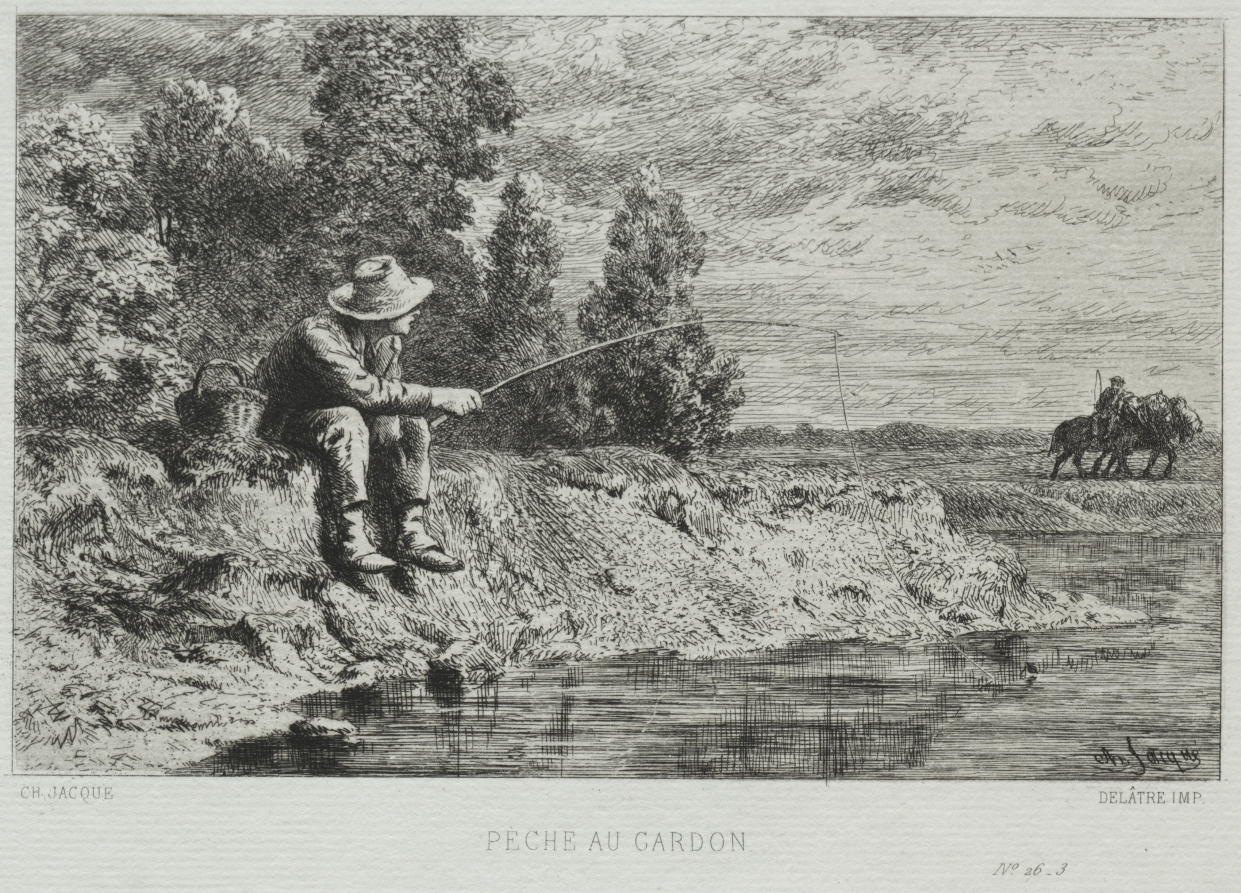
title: Fishing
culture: France, 19th century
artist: Charles-Émile Jacque (French, 1813–1894)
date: 1865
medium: etching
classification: Print